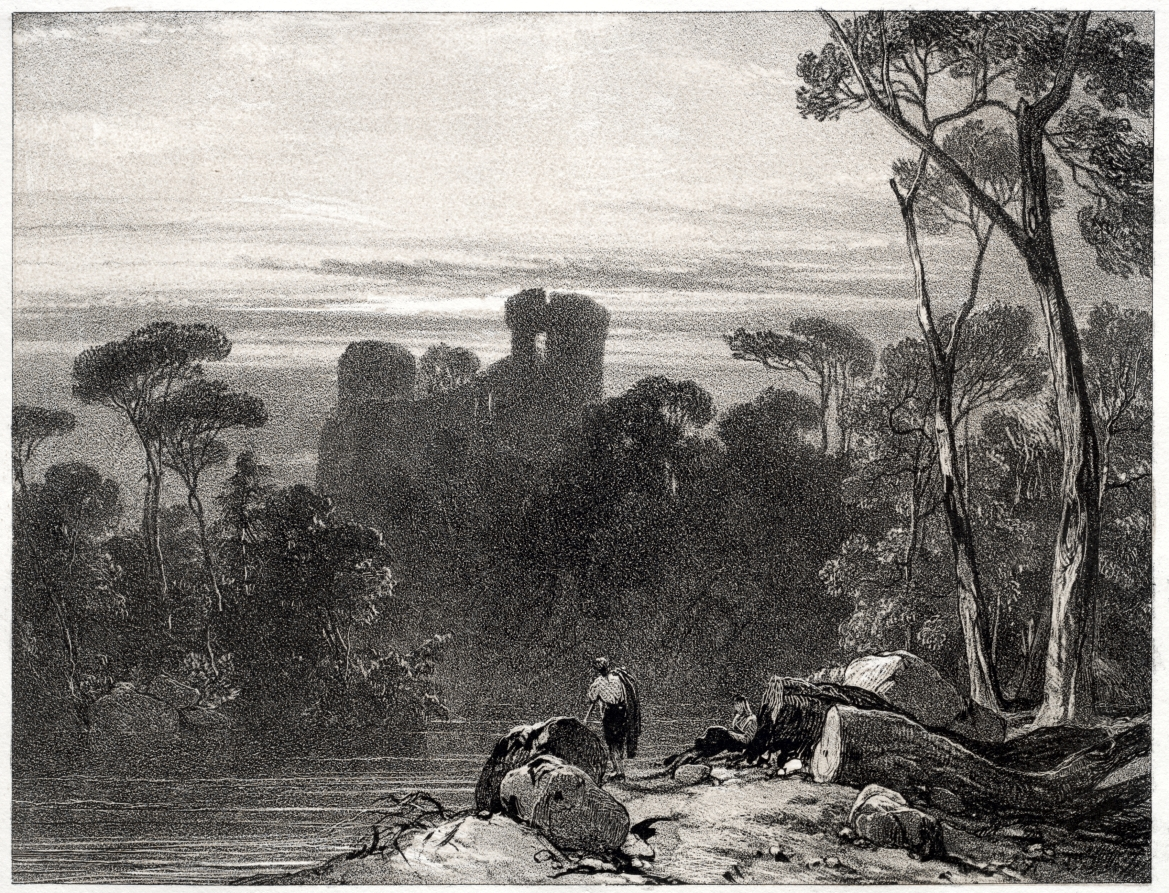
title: Bothwell Castle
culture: England, 19th century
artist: Richard Parkes Bonington (British, 1802–1828)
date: 1826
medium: lithograph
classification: Print